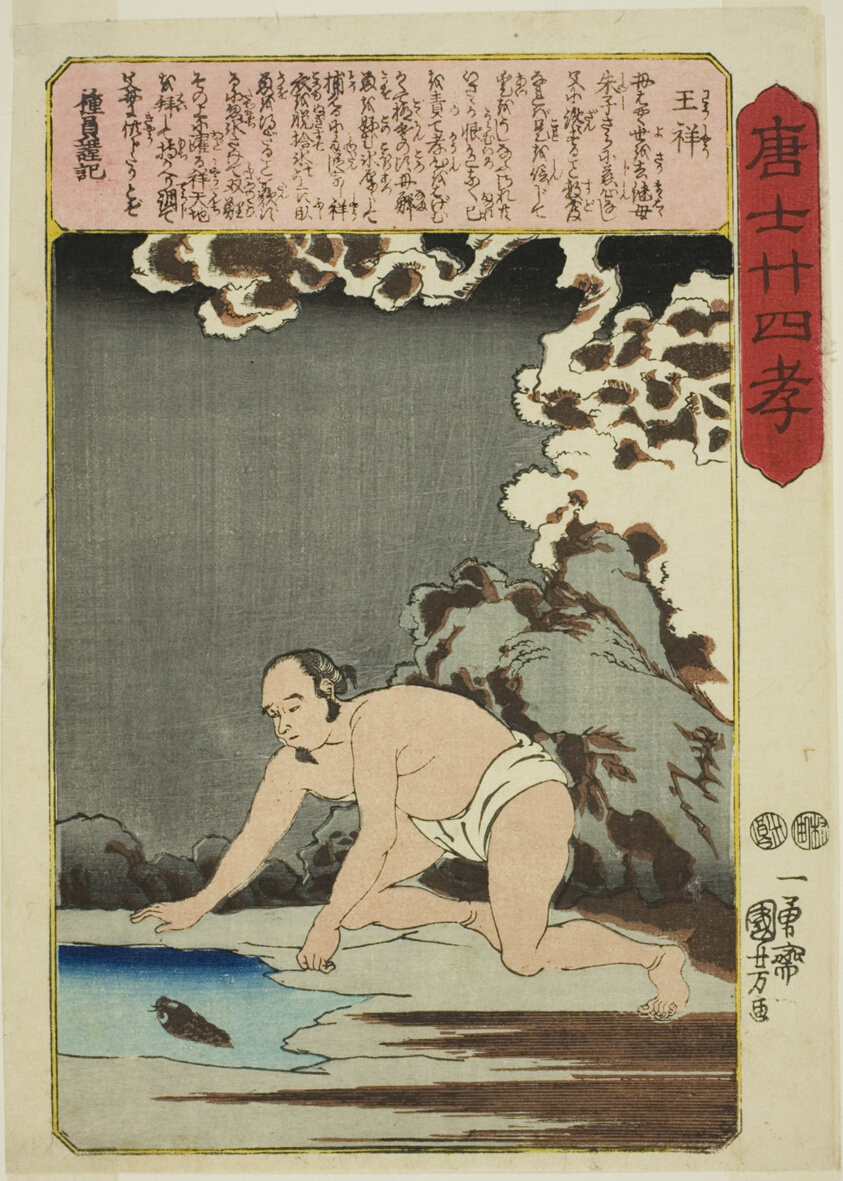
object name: Print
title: Wang Xiang (O Sho), from the series "Twenty-four Paragons of Filial Piety in China (Morokoshi nijushiko)"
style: Japanese (culture or style)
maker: Utagawa Kuniyoshi (Japanese, 1797-1861)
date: c. 1848/50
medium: Color woodblock print; chuban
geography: Japan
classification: woodblock print; print; asian art